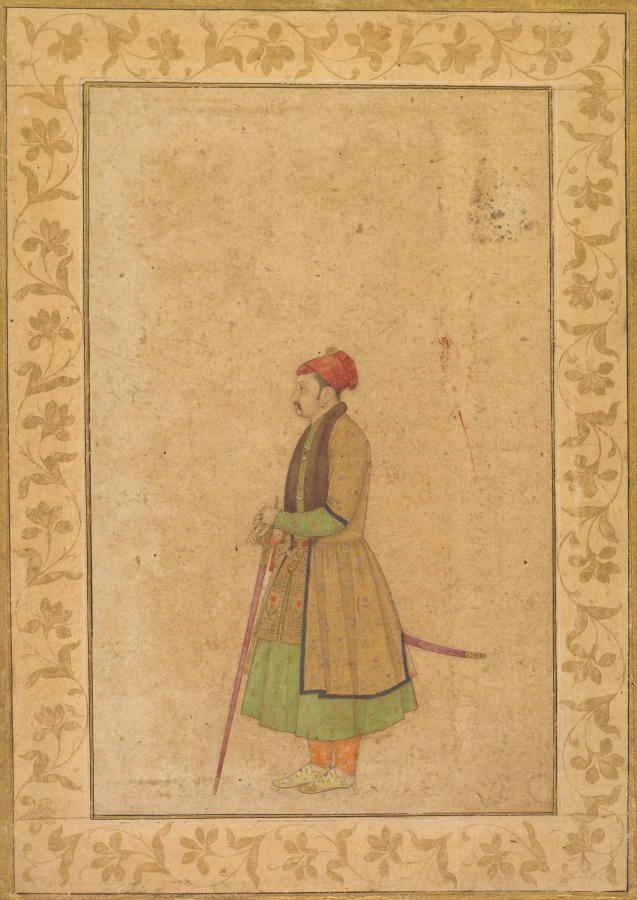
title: Portrait of Raja Ram Singh of Amber (r. 1667-1688) with a Deccan Sword (recto); Calligraphy (verso)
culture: India, Mughal court, 17th century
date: c. 1680–1685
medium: Gum tempera, ink, and gold on paper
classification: Painting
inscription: verso: Deccani Urdu (Karnati) lyrics in nasta‘liq script: “Bhairava” has a camphor-like fair complexion with [young] moon on the forehead and three eyes and with the crown of the matted locks over which the Ganges sparkles. In the one hand he has a human skull, and in the other a trident. His vehicle is a bull, and his body is white (besmeared with ashes). He has the skin of an elephant and of a lion on his back and carries ornaments provided by snakes and sits under the shade of the heavenly wish-fulfilling tree [kalpavriksha]. A white beautiful woman is playing upon a drum [mridanga] at a place beyond Kailash mountains. These, says Ibrahim, are the features of the most charming and excellent Raga Bhairava. (after Kitab-i Nauras Ahmad 1956, 98–99, 130)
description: The sensitive, naturalistic rendering of weariness and forbearance in the face belies the trappings of favor bestowed on Ram Singh by the Mughal emperors Shah Jahan and Alamgir, whom he served as courtier and general between 1643 and 1688. He was a Hindu ruler from the kingdom of Amber in Rajasthan, under the control of the Mughal empire. Spending most of his life at the imperial court or leading military expeditions for the Mughals, this portrait was included in a Mughal album and inscribed with an Urdu verse indicating his value to the empire: "wherever he has led an expedition, victory is his." He wears a sumptuous coat of honor with a fur collar, woven with gold threads and floral sprigs and costly rubies, emeralds, and pearls. The straight sword with enameled hilt may be the one gifted to him by the emperor upon his succession to the throne as king of Amber in 1667. His long history of service at the imperial court, however, was checkered with troubles, including his allegiances with failed successors of Shah Jahan and the escape of the rebel Shivaji under his watch.